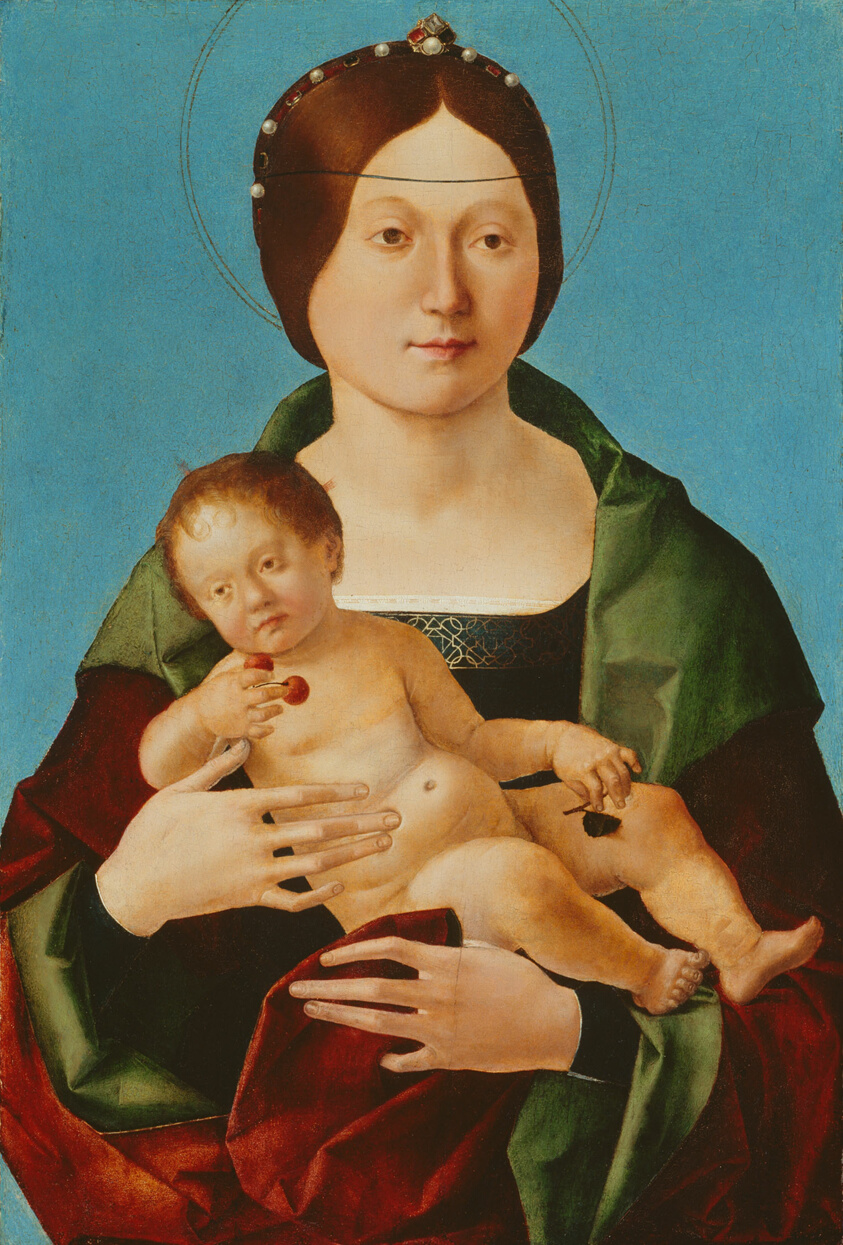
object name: Painting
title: Virgin and Child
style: 15th century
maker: Attributed to Ercole de' Roberti (Italian, 1455/56–1496)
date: 1490/96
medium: Tempera or oil on panel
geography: Italy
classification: painting; tempera; Italian; paint; oil paintings (visual works); oil on panel; european painting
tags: Virgin and child/Madonna and child, woman with children, woman, Virgin Mary, sons, religious figures, religious, religion, red (color), pearls, mother and child, mother, melancholy, jewelry, Jesus, green (color), Christianity, Christian subjects, children, cherries, babies